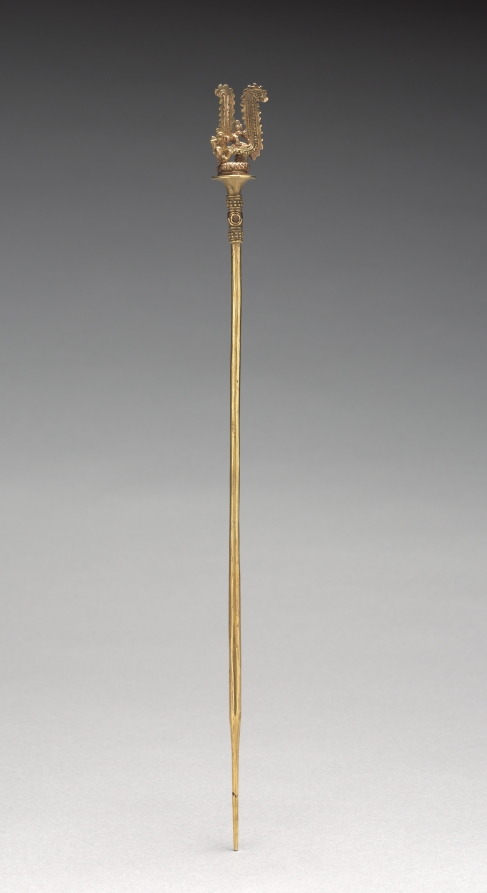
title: Lime Dipper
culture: Colombia, Calima region, Yotoco style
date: c. 1–800 CE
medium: gold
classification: Metalwork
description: Coca-leaf chewing was a widespread ritual in ancient South America. Utensils included a container and a dipper or spoon for powdered lime (made from seashells), added to the coca to enhance its gentle, stimulating effect. Colombian cultures are especially known for transforming these utensils into works of art made of precious metal. The image on the tallest dipper is wonderfully complex. A serpent coils at the bottom, beneath a snarling animal with a huge, vertical tail. This animal has a tiny monkey on its back; the monkey also has a huge tail, which rests on the first animal's head like a headdress. This intricate image was created with the lost-wax casting process.